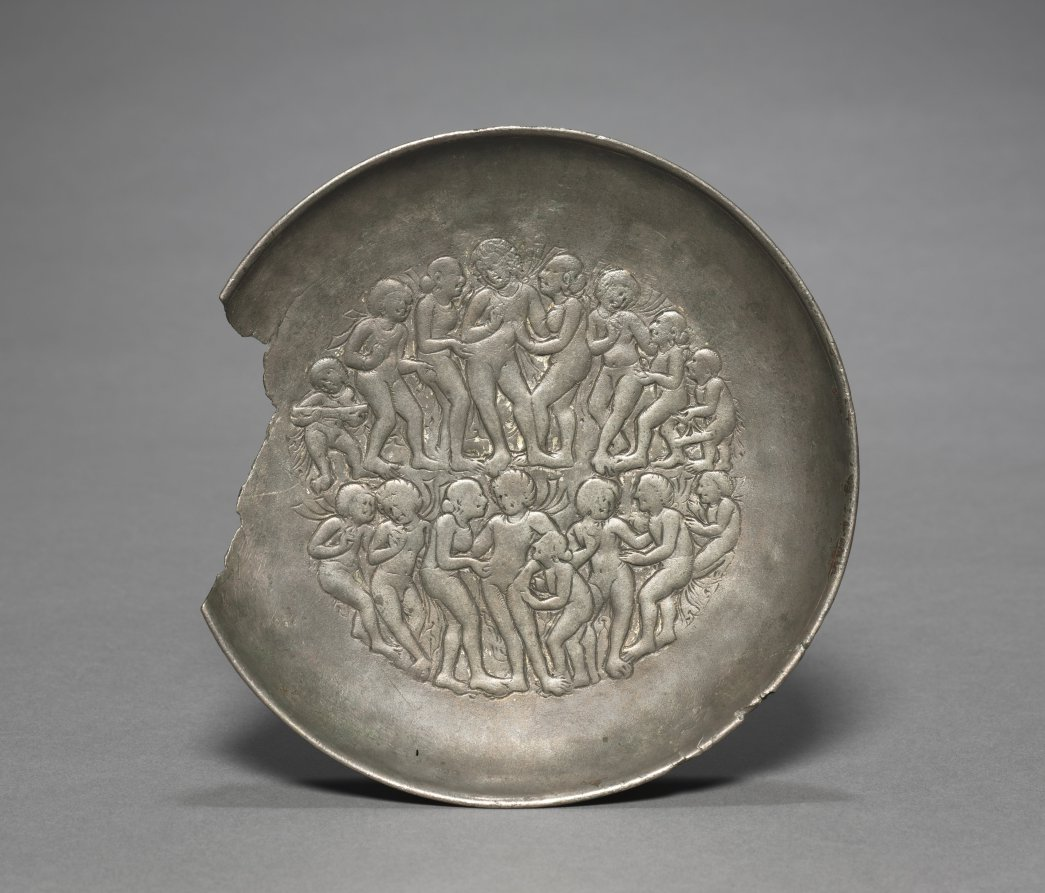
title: Plate with a Scene of Revelry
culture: Northwestern India, possibly Tanesara Mahadeva, Gupta period (320-647)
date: 400s CE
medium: silver with alloy of tin and lead with traces of gilding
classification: Metalwork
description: This rare example of a silver plate from the Gupta period in India depicts the celebration of a spring festival. Figures made during this period are characterized by smooth and rounded body contours and short hairstyles with rows of curls. Though crowded, the masterful composition appears harmoniously unified in its two-tiered circular arrangement of figures.